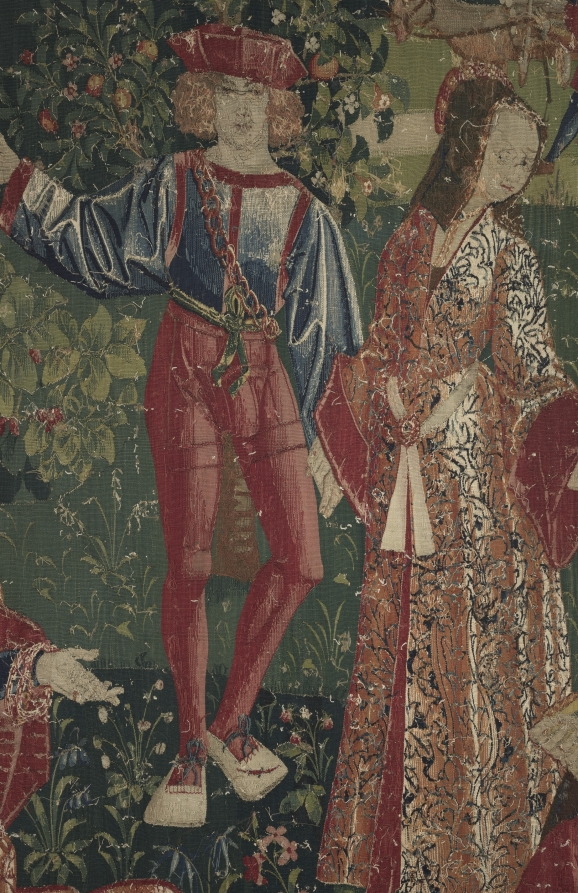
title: Youth (from Chateau de Chaumont set)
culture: France, Lyon(?), early 16th century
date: 1512–15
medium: silk and wool; tapestry weave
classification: Tapestry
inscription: French verse in Gothic letters translates as follows: Youth triumphs while its heart is healthy, And when it seems to hold all in its hand. But this triumph is without eternity. Here one sees the example full well: Those who are happy hide death in thier heart. Let the young heed this warning.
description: Louise of Savoy (1476-1531), queen mother of King Francis I, is depicted here in a sumptuous brocaded velvet in the center. She addresses youthful figures including Éléonore, Pierre Sala’s daughter who is facing her future husband, Hector. On the right, King Louis XII (died 1514) stands in front of the Chateau Langais where he had married Anne of Brittany. Above is Hector’s deceased father with a partially concealed skull under his robe, while a woman expresses surprise at the sight. The verse in Old French at the top states that youthful happiness is not eternal: Youth makes sounds as long as its heart is healthy, And thinks that it holds all in its hand. But this triumph is not eternal. Here you see clearly an example: He that is happy has death in his breast. Of this you people should take note.